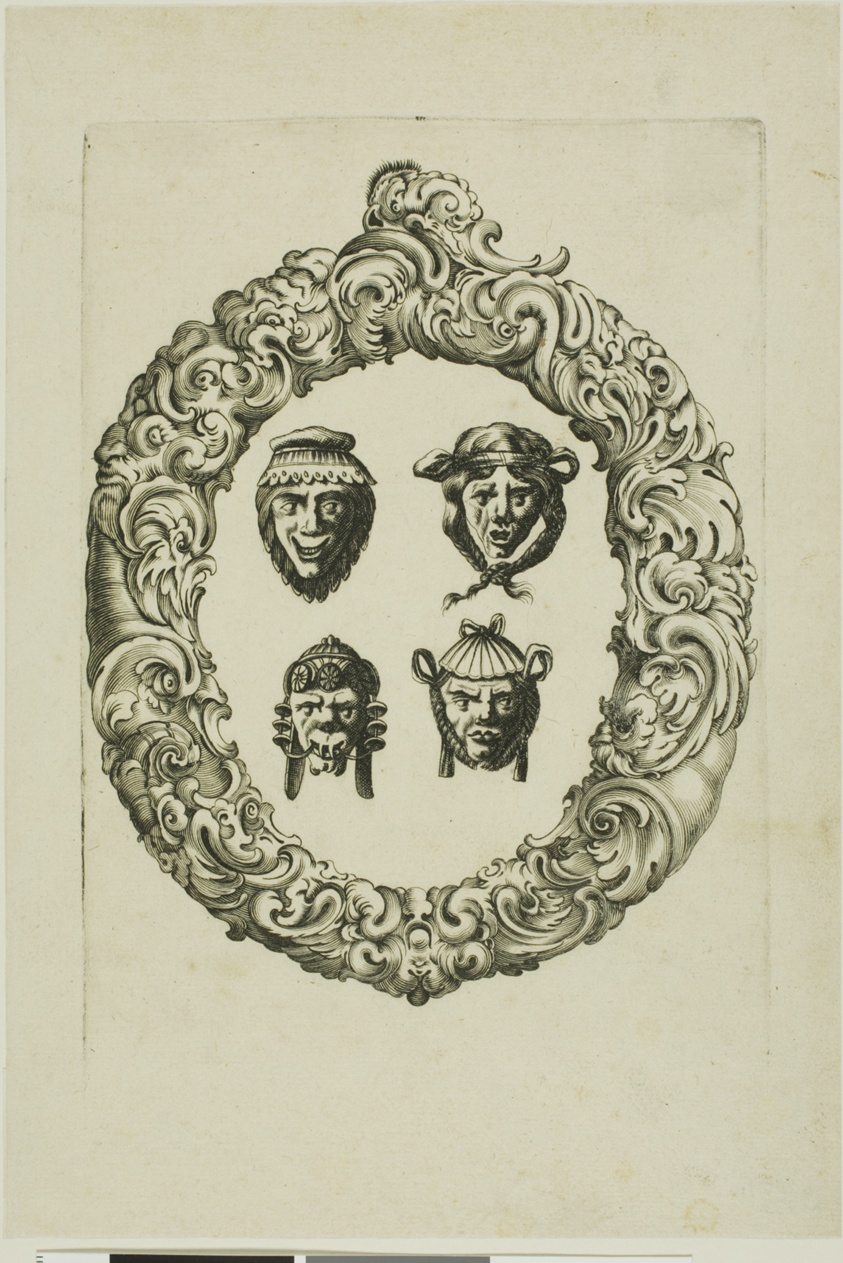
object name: Print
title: Letter O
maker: Peter Aubry (German, 1596-1668)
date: 1630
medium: Engraving on paper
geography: Germany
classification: engraving; print; prints and drawing